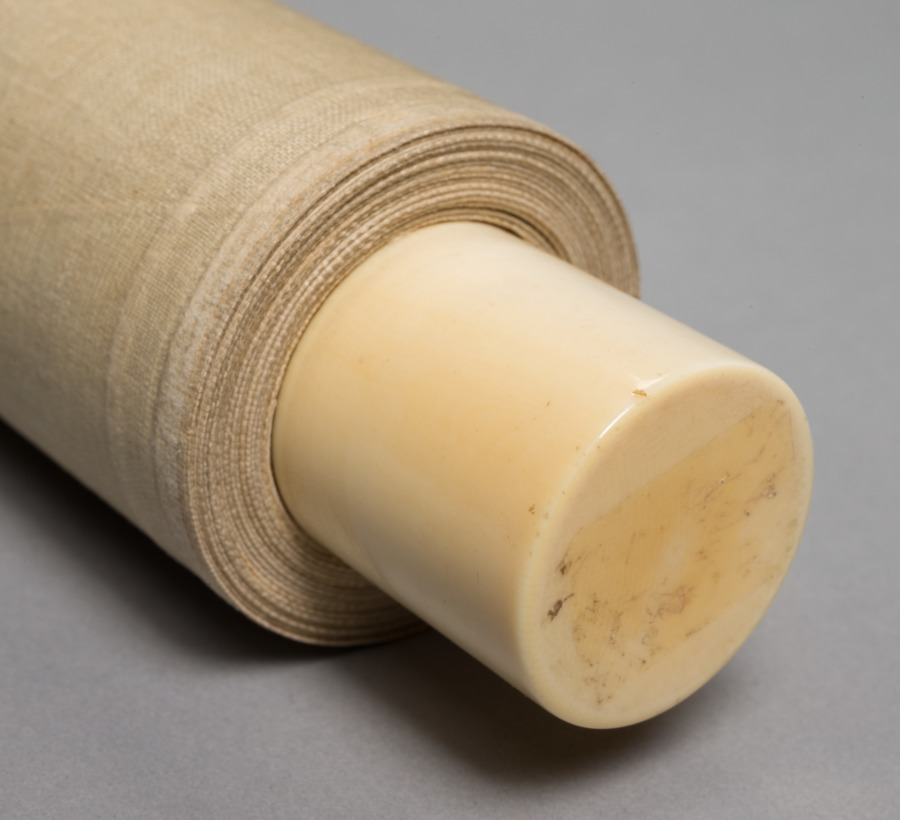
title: Tiger in Wind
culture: Japan, Edo period (1615–1868) to Meiji period (1868–1912)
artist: after Maruyama Ōkyo (Japanese, 1733–1795)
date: 1800s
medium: hanging scroll; ink on paper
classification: Painting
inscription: 「秋空一鶴」賛 長嘯一聲風括地「月渚」朱文方印「祐常之章」白文方印 壬辰初冬寫応挙 「應舉之印」白文方印・「仲選」白文方印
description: The seals appended to the inscription on this painting suggest that the text was brushed by Yūjō (1723–1773), an imperial prince who became a Buddhist monk and was abbot of Enman'in at Miidera. The line is from a poem attributed to a Yuan dynasty poet, Yu Ruyu (dates unknown), and describes the sound of a fierce wind lashing the ground. Wind is associated with the roar of the tiger. Yūjō was Maruyama Ōkyo's most important patron as a young artist, and this painting has a signature asserting that Ōkyo created it in 1772, the year before Yūjō's death. While Yūjō produced a preface for a now famous set of handscrolls he commissioned Ōkyo to paint, and a number of Ōkyo's compositions for Enman'in survive, this work would appear to be one imagining their relationship, as opposed to a genuine piece.